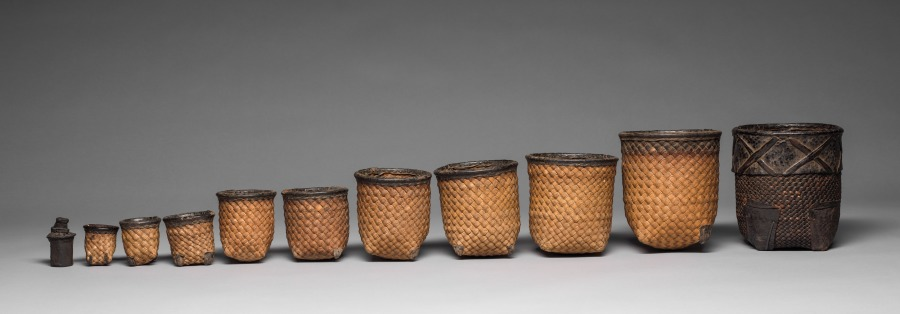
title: Set of Nesting Wedding Baskets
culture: Africa, Western Sudan, Burkina Faso, Lobi, 20th century (?)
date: c. 1900s ?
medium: Plant fiber and leather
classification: Vessels